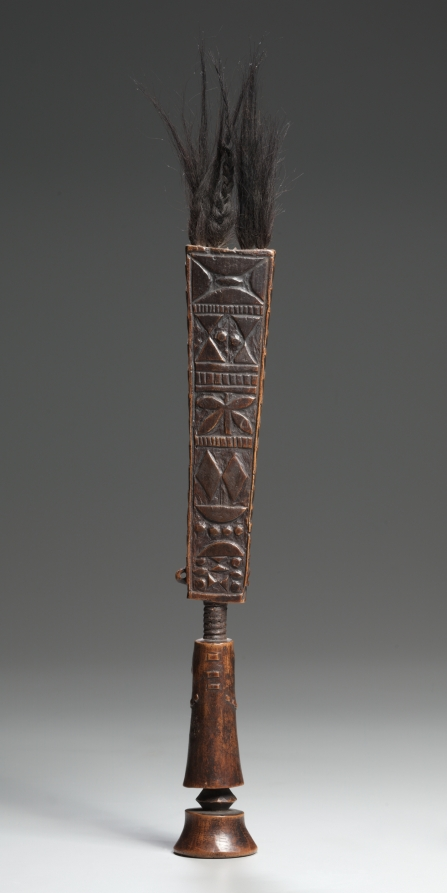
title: Female Figure (akua'ba)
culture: Africa, West Africa, Ghana, Fante-style maker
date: late 1800s–early 1900s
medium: Wood, hair, resin, and bone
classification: Sculpture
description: An infertile woman would be advised by a priest to commission such a sculpture and care for it as if it were her baby. With the aim to induce fertility, or to ensure the birth of a healthy and beautiful daughter, the akua'ba figure is carried on the woman's back inside her wrapper. After a successful birth, the figure is placed in the priest's shrine as an offering, or it is given to the newborn as a toy.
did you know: Akua'ba are always female, both because Akua’s first child was a girl, and because the Akan and Fante societies are matrilineal, meaning that it is women that extend the family line.